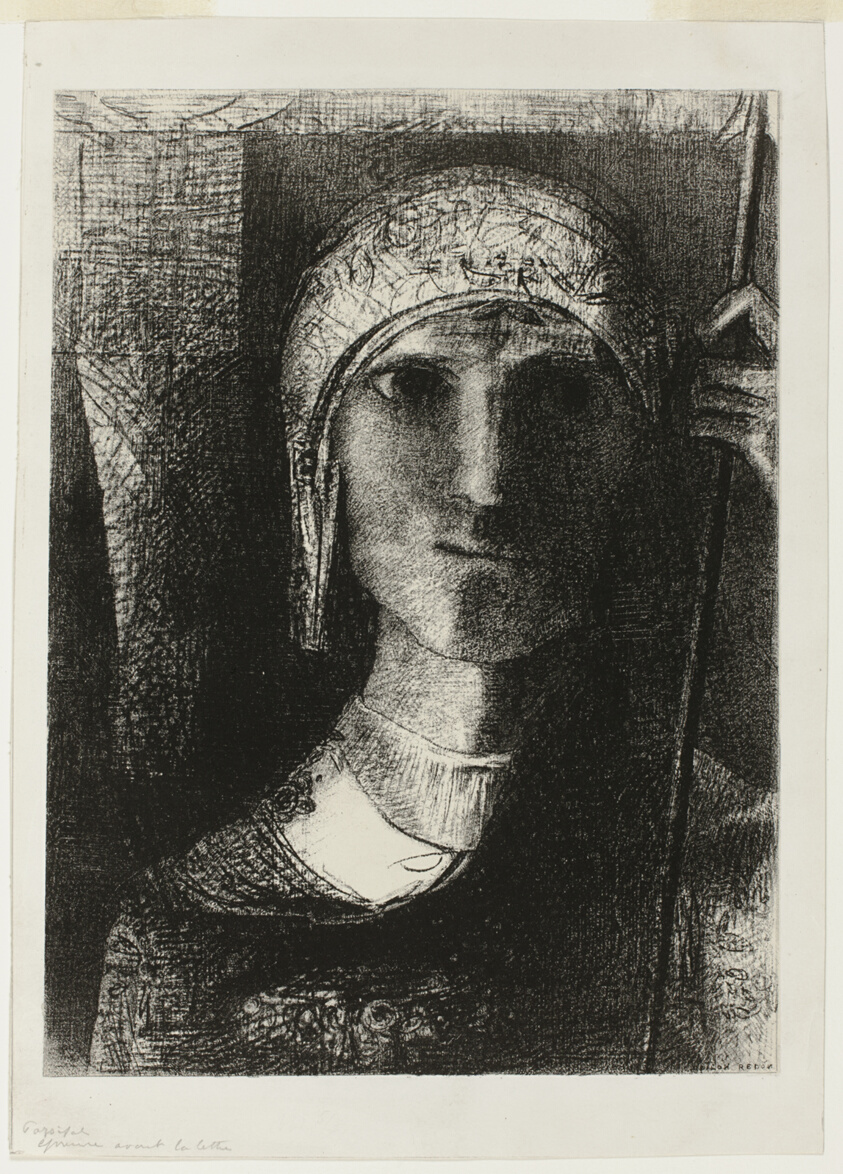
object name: Print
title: Parsifal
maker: Odilon Redon (French, 1840-1916)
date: 1891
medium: Transfer lithograph on mounted ivory China paper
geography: France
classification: lithograph; print; prints and drawing; paper